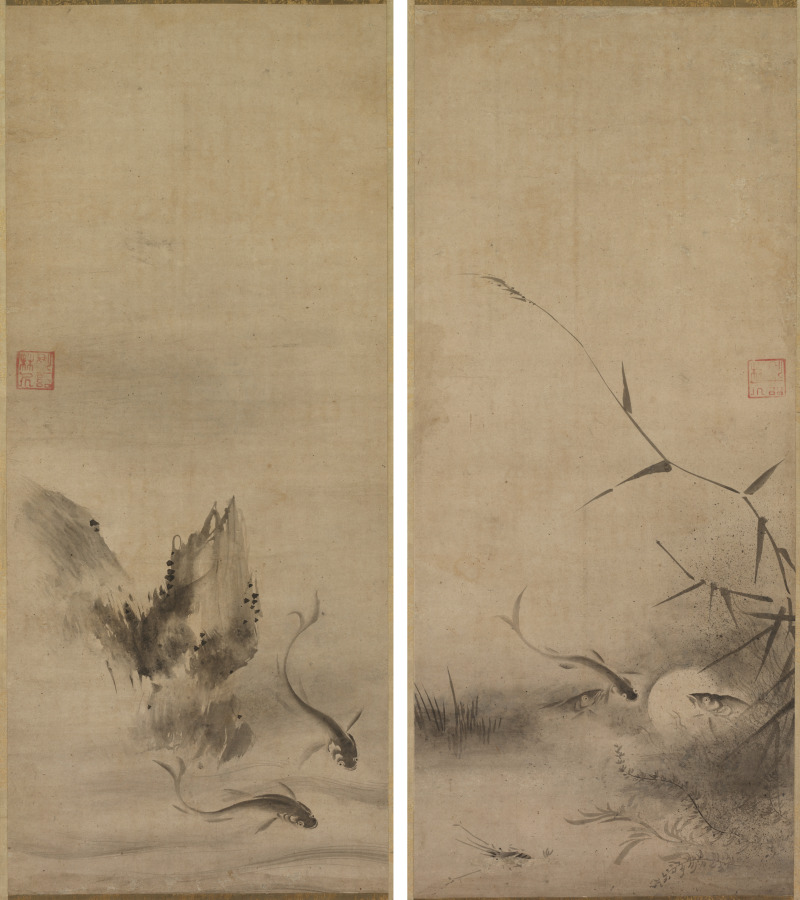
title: Fish and Rock; Fish and Seaweed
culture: Japan, Momoyama period (1573–1615)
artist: Rinkyo (Japanese)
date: 1573–1615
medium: pair of hanging scrolls; ink on paper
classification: Painting